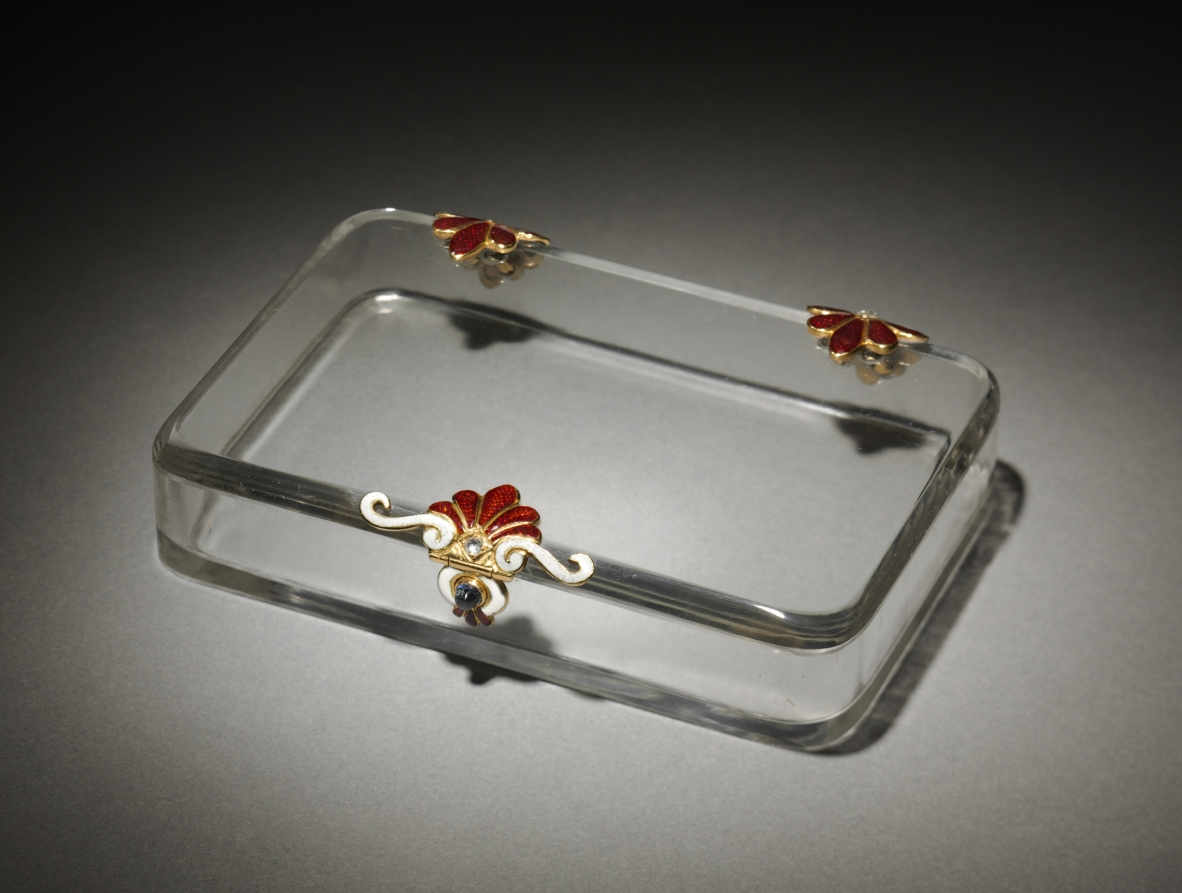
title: Cigarette Case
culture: Russia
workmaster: Mikhail Evlampievich Perkhin (Russian, 1860–1903)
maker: House of Fabergé (Russian, 1842–1918)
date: c.1895–1910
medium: rock crystal, enamel, gold, sapphire, diamond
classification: Rock crystal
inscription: Hallmark for Mikhail Perkhin (in Cyrillic); Fabergé (in Cyrillic).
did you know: Rock crystal is the name given to all clear colorless quartz also known as pure quartz.